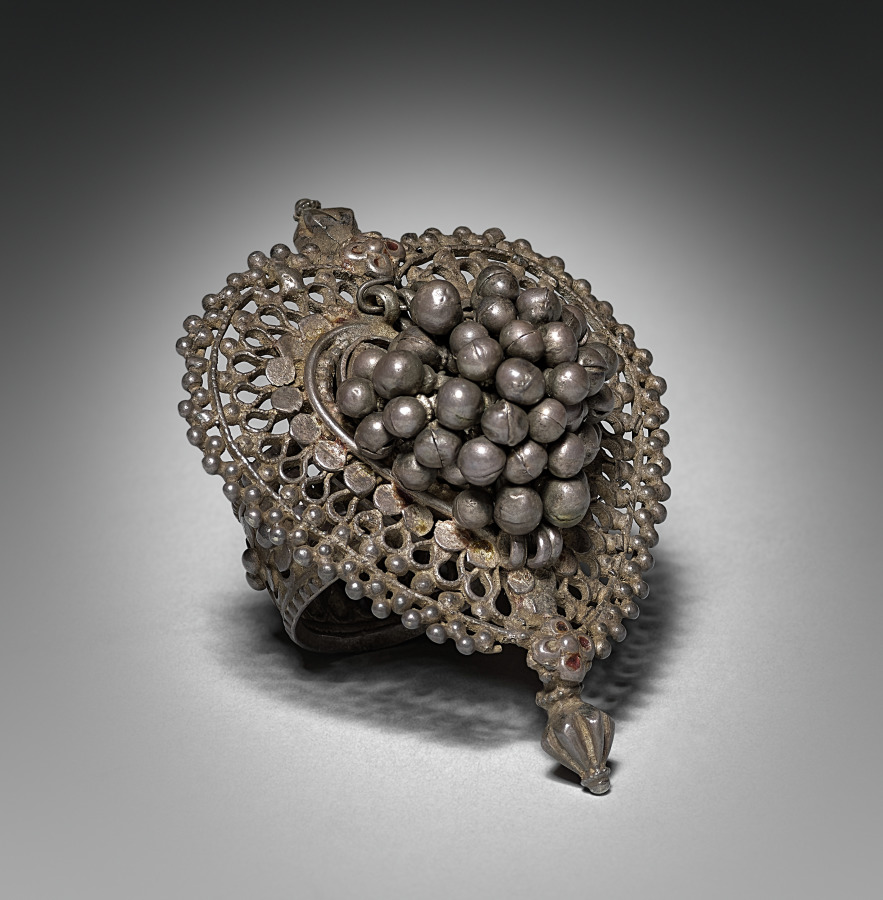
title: Ring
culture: India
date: 1800s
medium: silver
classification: Jewelry